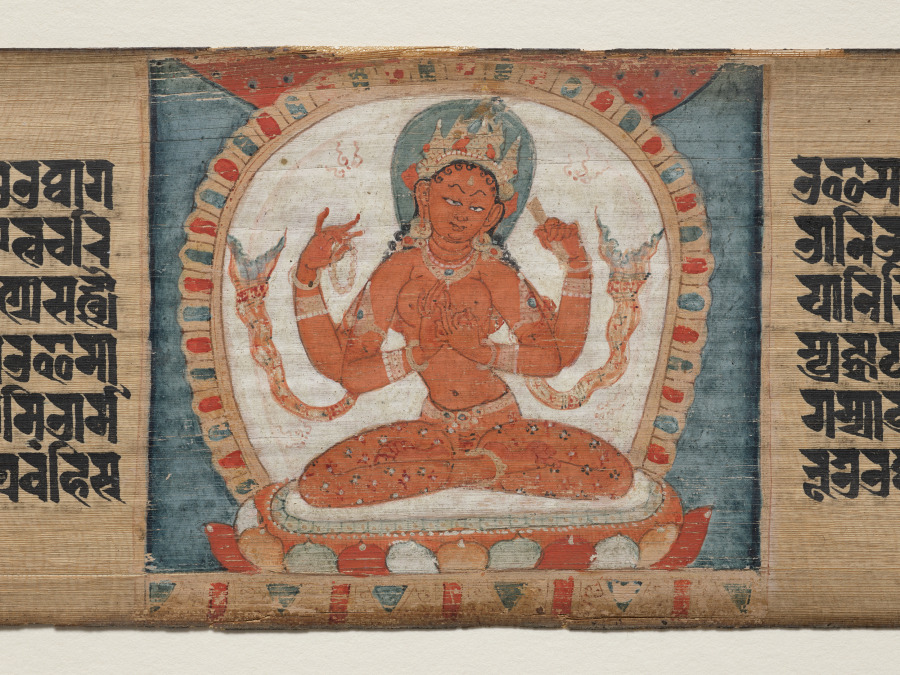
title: Prajnaparamita flanked by a white female figure and a white bodhisattva, folio 90 (recto), from a Manuscript of the Perfection of Wisdom in Eight Thousand Lines (Ashtasahasrika Prajnaparamita-sutra)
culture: Eastern India, Bihar, Vikramashila Monastery. Painting: Nepal, Kathmandu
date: Sunday, September 14, 1119 (year 239 of the Newar Samvat in the month of Ashvina)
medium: gum tempera and ink on palm leaf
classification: Painting